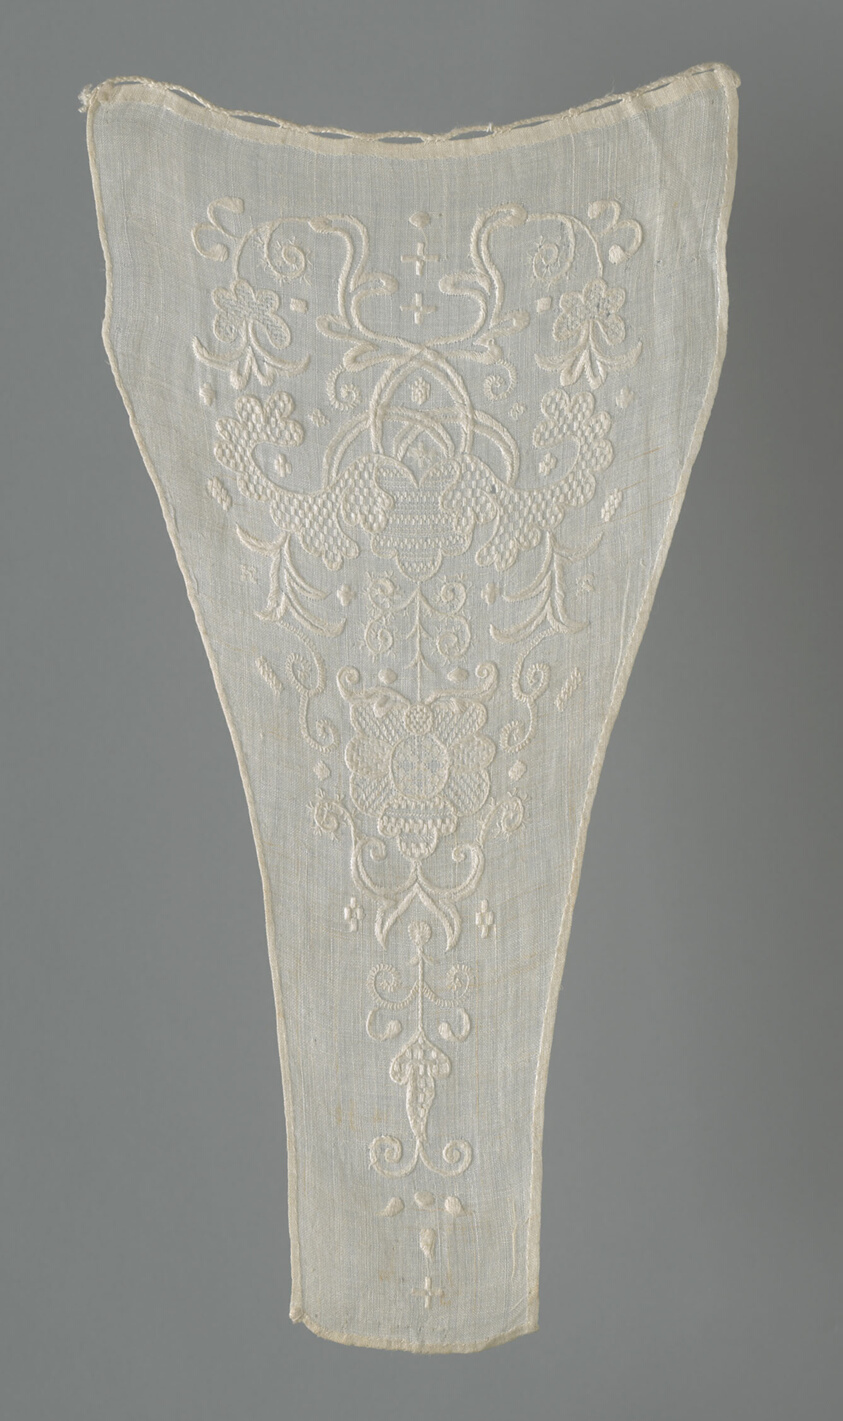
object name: Costume and Accessories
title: Stomacher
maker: France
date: 19th century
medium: Linen, plain weave; embroidered with linen yarns in buttonhole, chain, cross, crossed back, half cross, marking cross, satin, single satin, and stem stitches; attached cord of 8-strand 4-sided braid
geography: France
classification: textile; needlework (visual works); costume